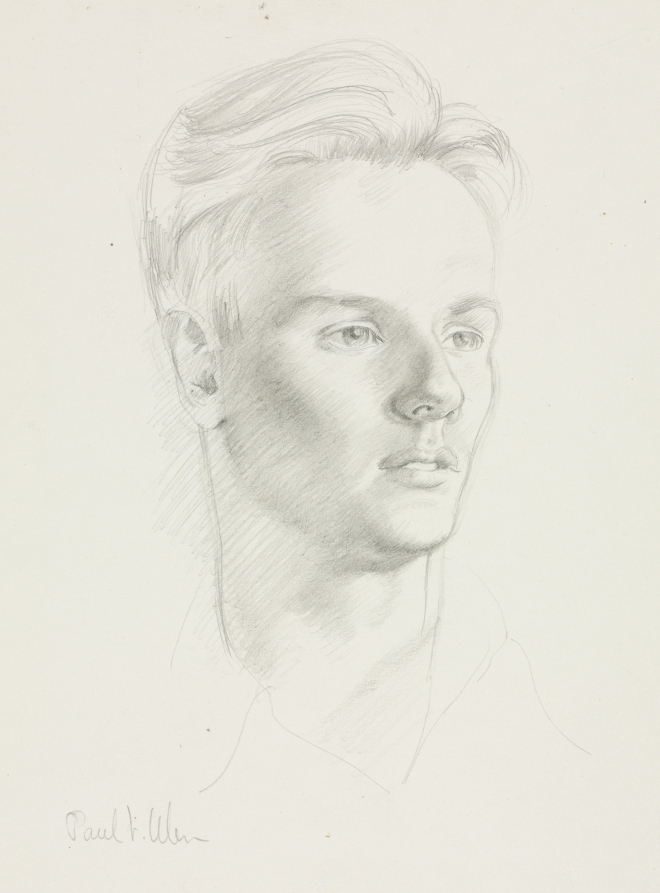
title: Head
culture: America, Ohio, Cleveland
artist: Paul V. Ulen (American, 1894–1923)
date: c. 1933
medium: pencil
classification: Drawing